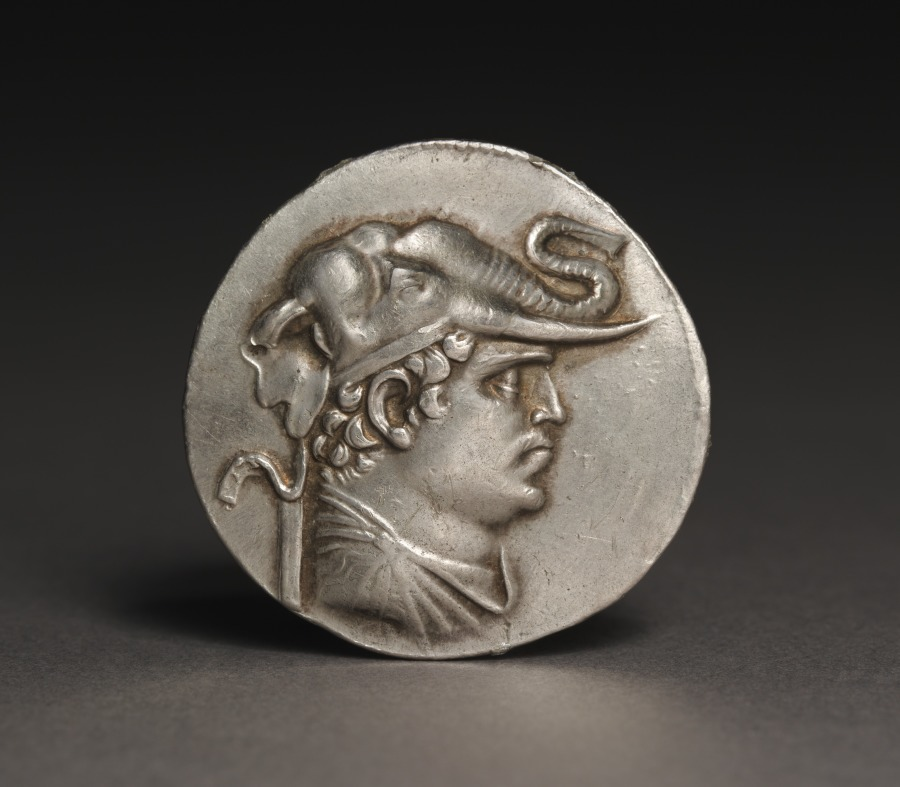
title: Tetradrachm Coin of Demetrios I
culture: Afghanistan, Bactria, Indo-Greek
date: 200–190 BCE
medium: silver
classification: Coins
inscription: BASILEOS DEMETRIOU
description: Demetrios I (222–180 BC) ruled the Indo-Greek kingdom of Bactria from 200 to 180 BC and minted this coin to commemorate his conquests over territories to the south, in present-day Pakistan. He linked his image on his coin to Alexander of Macedon (356–323 BC), who depicted himself with a lion scalp after his conquest of India; Demetrios substituted an elephant for the lion. On the reverse is Hercules, also identified with Alexander.